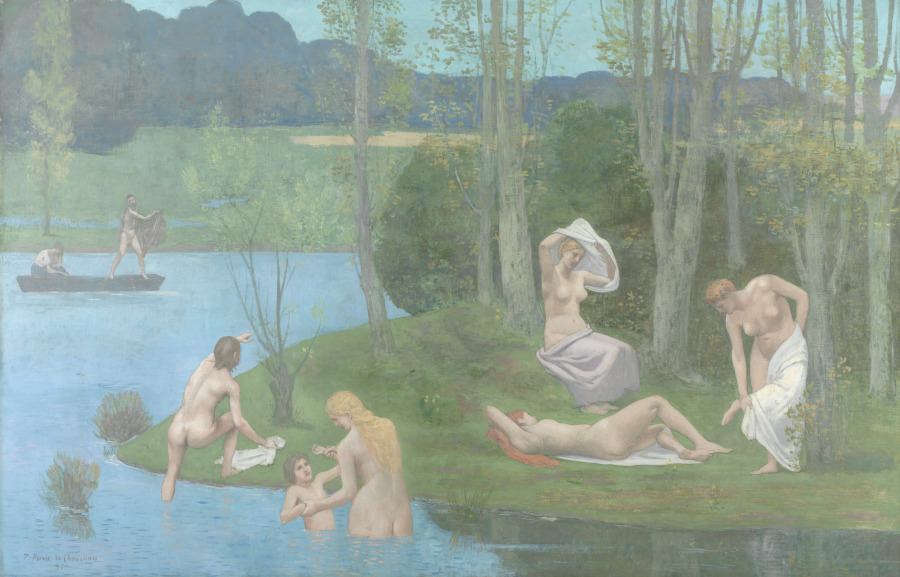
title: Summer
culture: France, 19th century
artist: Pierre Puvis de Chavannes (French, 1824–1898)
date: 1891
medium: oil on fabric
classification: Painting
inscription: Signed lower left: P. Puvis de Chavannes / 91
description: This painting is a smaller version of a mural on the same subject painted for the Hôtel de Ville in Paris, which has a companion mural titled Winter. A writer at the time described Summer as "filled with joy, happiness, rest, and the apotheosis of life." Georges Seurat, Paul Gauguin, and Pablo Picasso were among the many modernists influenced by Puvis de Chavannes’s dreamlike themes and anti-naturalistic style of simplified, flattened forms.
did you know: Puvis de Chavannes was considered one of the foremost artists in France in the second half of the 1800, and was particularly admired for his murals. This painting is a version of a mural he painted in 1889, which was particularly difficult because the wall had a door in the middle.